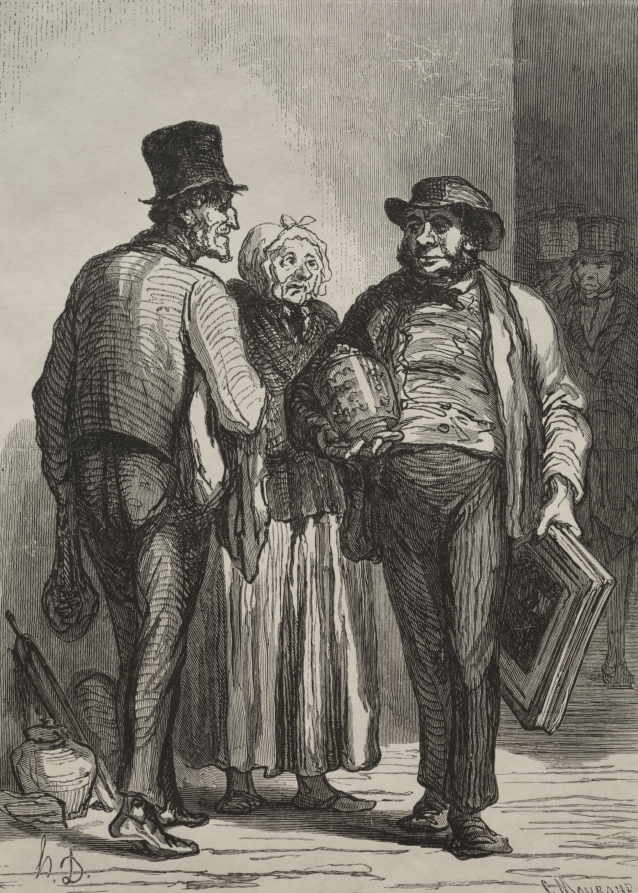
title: The Auction House: The Dealers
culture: France, 19th century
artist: Honoré Daumier (French, 1808–1879)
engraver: Charles Maurand (French, 1824–1904)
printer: François Louis Schmied (Swiss, 1873–1941)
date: 1863, printed 1920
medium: wood engraving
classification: Print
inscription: Lower margin, pencil: 42/75 ; red stamp: FLS